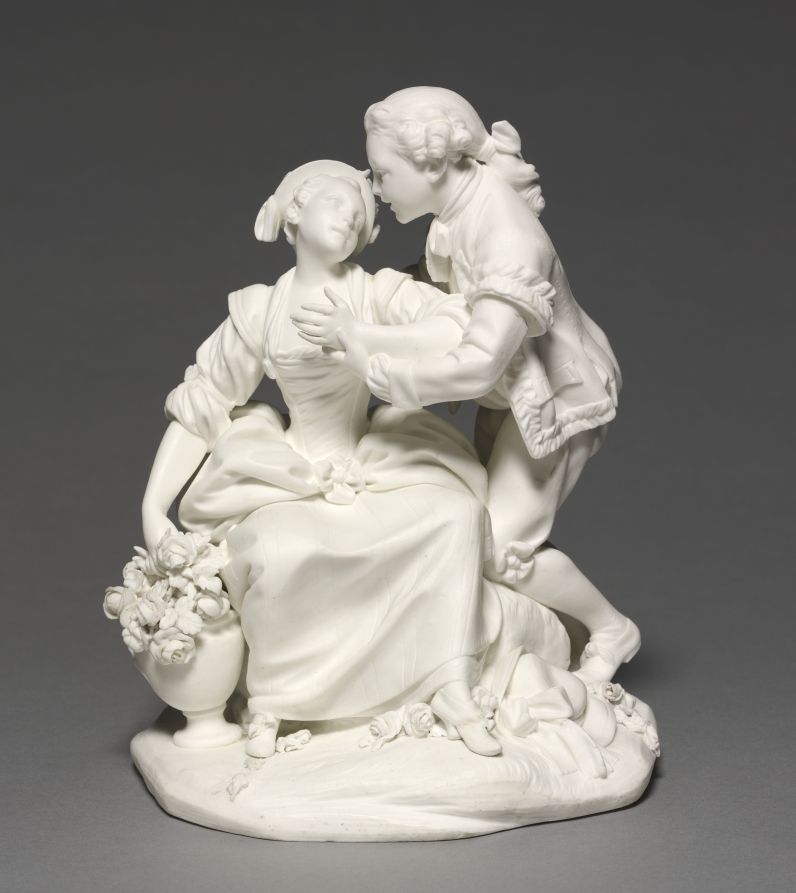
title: Figure Group of the Festival at the Chateau (La fête au château) or the Model Fidelity (La fidélité modèle)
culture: France, Sèvres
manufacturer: Sèvres Porcelain Factory (French, est. 1756)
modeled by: Etienne-Maurice Falconet (French, 1716–1791)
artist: after a design by François Boucher (French, 1703–1770)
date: 1766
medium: unglazed soft-paste porcelain (biscuit)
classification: Ceramic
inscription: 'B' incised on top of base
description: Recognizable porcelain figures and figure groups modeled after contemporary theatrical works produced by the Parisian company Opéra-Comique were produced at the Vincennes factory as early as 1752. This group illustrates a scene from a play credited to Charles-Siméon Favart, Fête au Château (Festival at the Castle), when the gardener Jacquot and his love Colette reunite.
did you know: The introduction of Sèvres porcelain figures modeled after the Opéra-Comique’s theatrical productions may have resulted from the friendship between François Boucher, designer of many early Sèvres porcelain figures, and Charles-Siméon Favart, director of the theater in 1758.